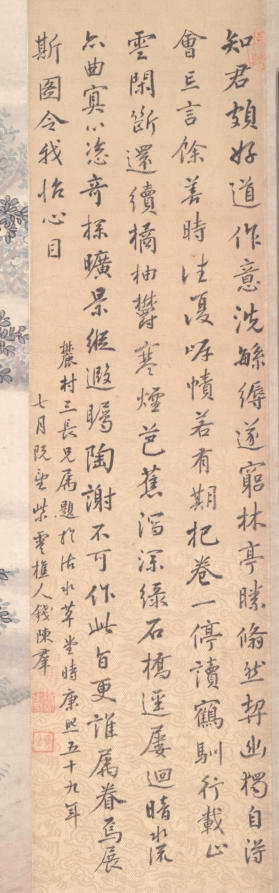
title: Portrait of An Qi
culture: China, Qing dynasty (1644-1911)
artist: Wang Hui (Chinese, 1632–1717)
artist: Tu Luo (Chinese, active c. 1715)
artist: Yang Jin (Chinese, 1644–1728)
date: 1715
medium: hanging scroll; ink and color on paper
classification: Painting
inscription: [印]上下千年. 麓村高逸：康煕乙未季春，廣陵涂洛寫照，海虞楊晉布景，八十四叟王翬補竹石。[印]耕煙; 王翬之印.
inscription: 俯視塵寰逸韻高，襟懷潚灑興偏豪。/ 琴書座右親風雅，竹石池邊拭羽毛。/ 蕉葉亂雲遮北礀，鶴翎凝雪戀東皋。/ 翩翩度量如君少，靜對秋江萬斛濤。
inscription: 知君頗好道，作意洗緐縟。/ 遂窮林亭勝，翛然契幽獨。/ 自得會忘言，餘善時往復。/ 岸幘若有期，把卷一停讀。/ 鶴馴行載正，雲閑斷還續。/ 橘柚欎寒煙，芭蕉瀉深綠。/ 石橋逕屢迴，暗水流亦曲。/ 真心恣奇探，曠景縱遐矚。/ 陶謝不可作，此旨更誰屬。/ 眷焉展斯圖，令我怡心目。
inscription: 逸興迥絶塵，風流仰高躅。/ 側無鹿角巾，横呈豹皮褥。/ 胸藏山壑富，座列琴囊足。/ 橙懸萬顆黄，蕉散一叢綠。/ 泉清鶴景長，樹遠雲光續。/ 披圖識性情，伊人温似玉。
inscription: 風雅出塵寰，披圖見一斑。/ 橘香新雨後，竹影夕陽間。/ 流水鳴前澗，歸雲渡遠山。/ 幽棲如可遂，應許共追攀。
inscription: 蕭灑披襟坐，琴書逸興長。/ 衫分蕉葉碧，冠學竹皮黄。/ 高樹穿雲斷，流泉帶菊香。/ 幽懷真曠達，何地不羲皇。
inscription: 秋色滿林壑，孤琴獨玄閒。/ 境歸簪紱外，道在水雲間。/ 棄智如藏璞，栖心静若山。/ 看君此圖畫，永以謝塵顏。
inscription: 修竹叢蕉坐綠天，君容早歳已如仙。/ 山中寄謝王摩詰，頭白方知住輞川。/ 千樹勝封萬戸侯，西風載滿李衡舟。/ 看君高致輕軒冕，坐享江鄉富貴秋。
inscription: 6 seals unidentified.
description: An Qi, the subject of the portrait, was a second-generation salt merchant from Korea. He used part of his wealth to collect art. At the time this painting was commissioned, An was less than 40 years old. He is represented as a Daoist recluse in nature, informally dressed with attributes such as books and a wrapped guqin instrument, a portrait convention for literati-scholars since the Six Dynasties period (220–589 CE). The local Taihu rock, banana plants, and crane suggest a southern garden and a life in seclusion. An’s portrait is evidence of merchants aspiring to the scholar-official class. According to the inscription, this painting was the joint effort of three men, the eldest and most famous was Wang Hui. While the garden setting is homogenous in style, it contrasts with the application of opaque pigments and shading employed for the depiction of An Qi’s face.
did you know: Seven of An Qi's close friends wrote poetic inscriptions on the silk brocade mount around his portrait.